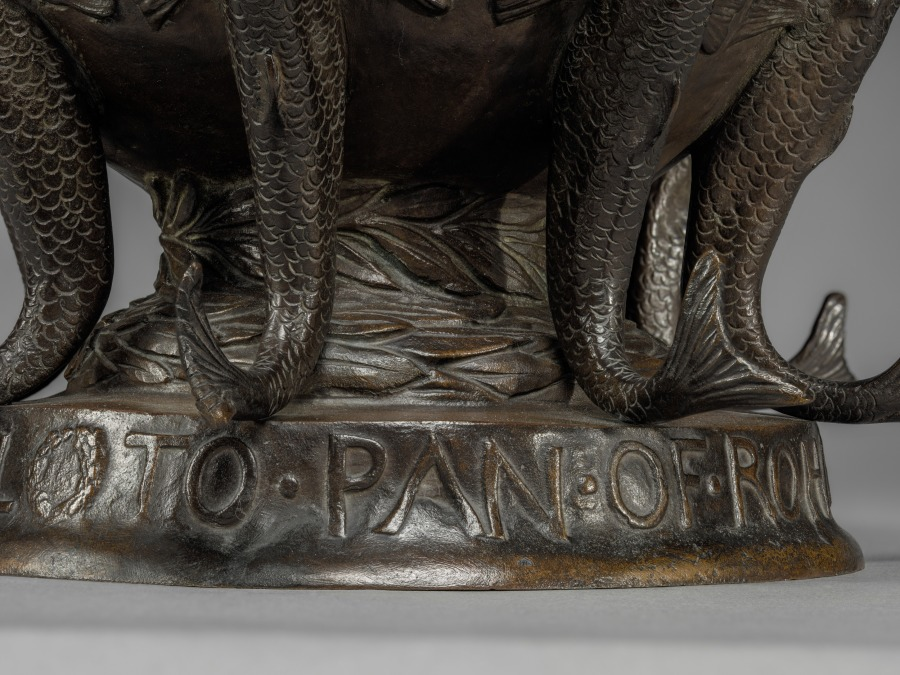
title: Pan of Rohallion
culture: America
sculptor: Frederick William MacMonnies (American, 1863–1937)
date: 1890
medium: bronze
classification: Sculpture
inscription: Signed on globe: Frederick MacMonnies, Paris 1890. © 1894. Inscribed around base: TO PAN OF ROHALLION ANNO DOMINI MDCCCLXL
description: Rohallion in the title refers to the name of an estate in New Jersey, whose owner commissioned MacMonnies to create a large fountain of this design for a garden pool. Later, the artist made several smaller versions, such as this example. Here, the ancient Greek god Pan plays his musical pipes while standing on an orb supported by fish.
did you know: The character of Peter Pan, including his flute playing, references the Greek god Pan.